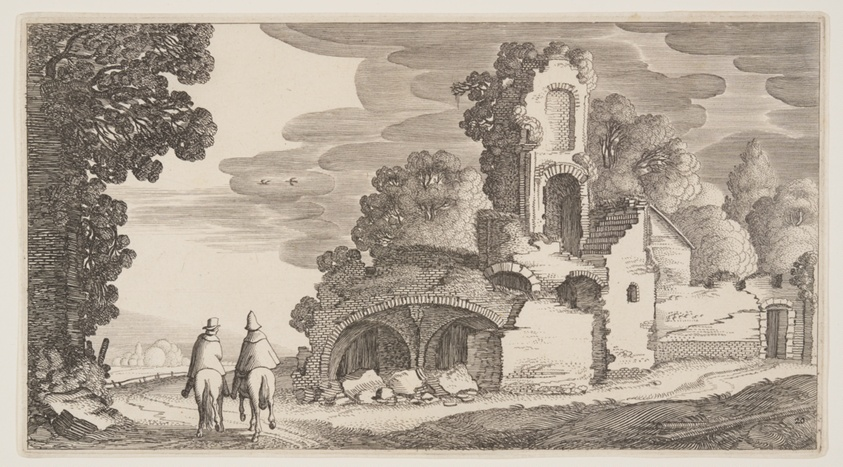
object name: Print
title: Ruins Along a Road, from Landscapes (Playsante Lantschappen)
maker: Attributed to Claes Jansz. Visscher II (Dutch, 1586-1652); after Jan van de Velde II (Dutch, c. 1593-1641)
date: c. 1641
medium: Etching, with engraving, on ivory laid paper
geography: Netherlands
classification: etching; paper; print; prints and drawing